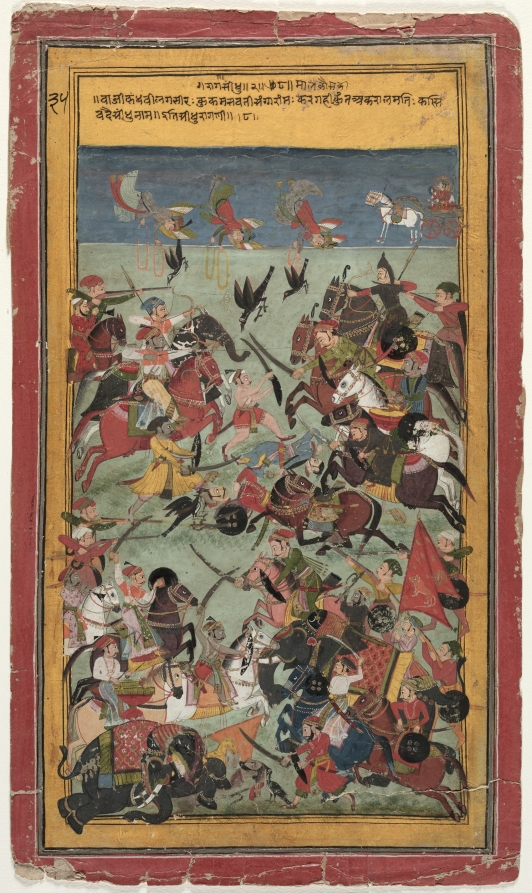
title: Sindhu Raga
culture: Northwestern India, Rajasthan, Rajput Kingdom of Mewar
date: c. 1720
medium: Gum tempera and ink on paper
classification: Painting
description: The inscription at the top identifies this painting as Sindhu Raga, which is the raga (or musical mode) of heroic sentiment. The painting is meant to elicit the same feelings in the viewer as a rousing piece of music played in the Sindhu key. Paintings of Sindhu Raga depict battle scenes. In this example, the composition conveys the chaotic melee and violence of war. Heads are being lopped off; carrion birds swoop down unfazed. Above the horizon against the sky at the far right is the god of war, Karttikeya, in his chariot. Three angels carry garlands for the dead.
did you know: Most of the warriors are on horseback and are armed with bows and arrows, swords, lances, and shields, as well as rifles. Two elephants appear in the foreground.